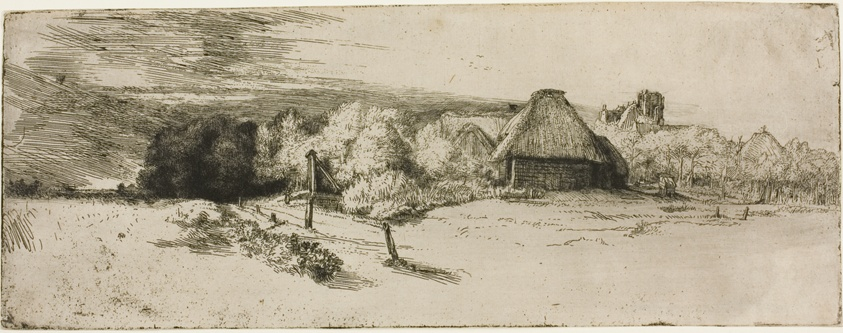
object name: Print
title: Landscape with a Farm Building and the "House with the Tower"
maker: Rembrandt van Rijn (Dutch, 1606-1669)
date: c. 1650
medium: Etching and drypoint on Japanese paper, laid down on cream laid paper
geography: Holland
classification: etching; print; prints and drawing; paper; drypoint